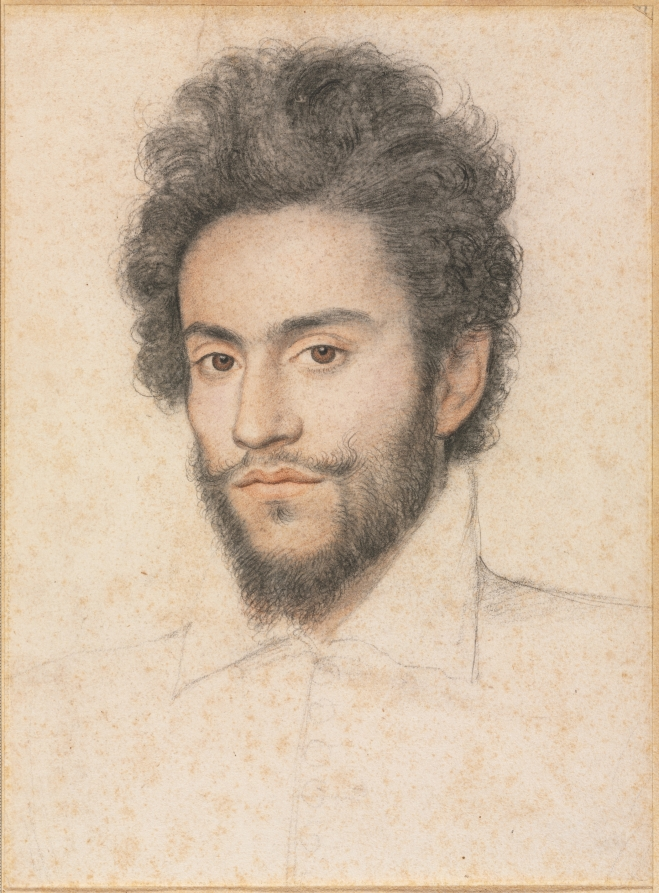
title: Young Man with a Beard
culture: France, 16th century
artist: attributed to François Quesnel (French, 1543–1619)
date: 17th century?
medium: black, red, brown, and white chalk with stumping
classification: Drawing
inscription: VERSO, lower left, in graphite: ChW ; SECONDARY SUPPORT, upper left, in brown ink: 16.